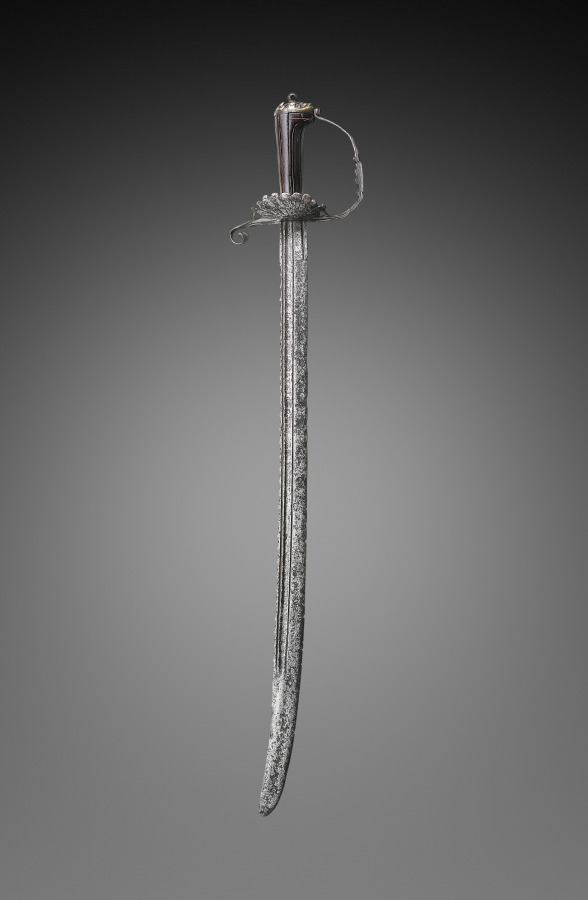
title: Hunting Sword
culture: Netherlands, early 1700s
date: c. 1700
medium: steel, wood, brass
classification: Arms and Armor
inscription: IOHAN VINNDT / NICHOLAS DORRAN